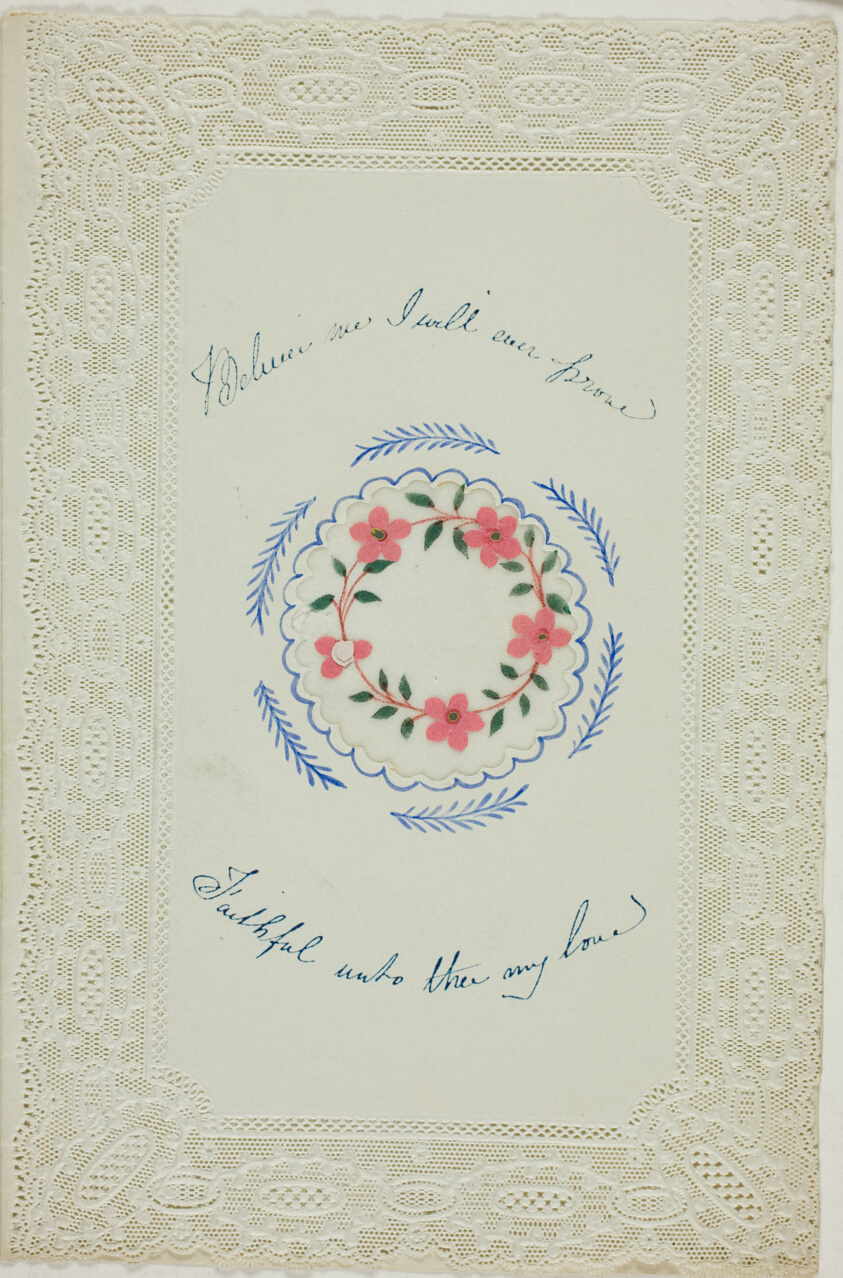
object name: Drawing and Watercolor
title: Believe Me I will Ever Prove (valentine)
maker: Unknown Artist; English, 19th century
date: c. 1840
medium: Collaged elements and watercolor, with pen and blue ink on cut and embossed ivory wove paper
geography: England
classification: valentine; prints and drawing; paper